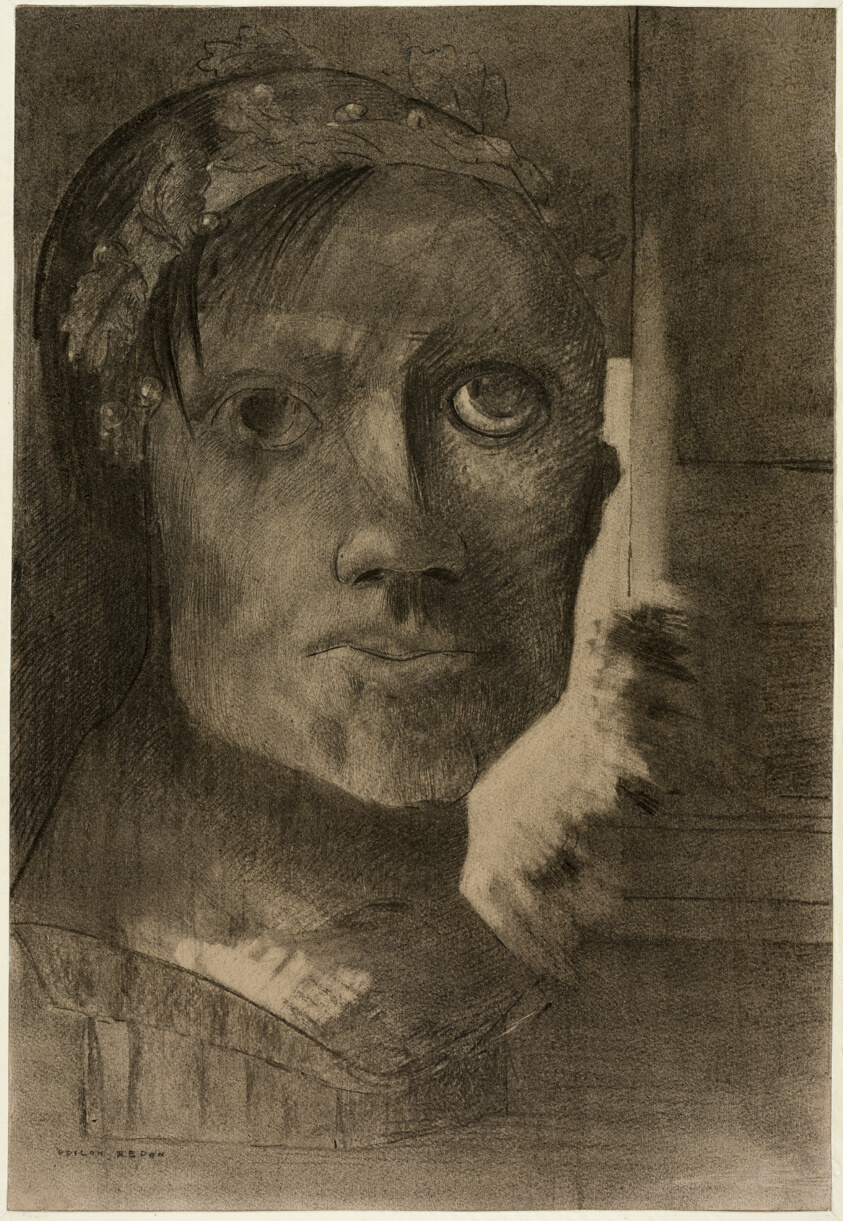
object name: Drawing and Watercolor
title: False Glory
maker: Odilon Redon (French, 1840-1916)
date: c. 1885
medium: Various charcoals, with incising, stumping, wiping, erasing, and subtractive brushwork, on pale-pink wove paper altered to a pale, golden tone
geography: France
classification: charcoal; drawings (visual works); prints and drawing; paper